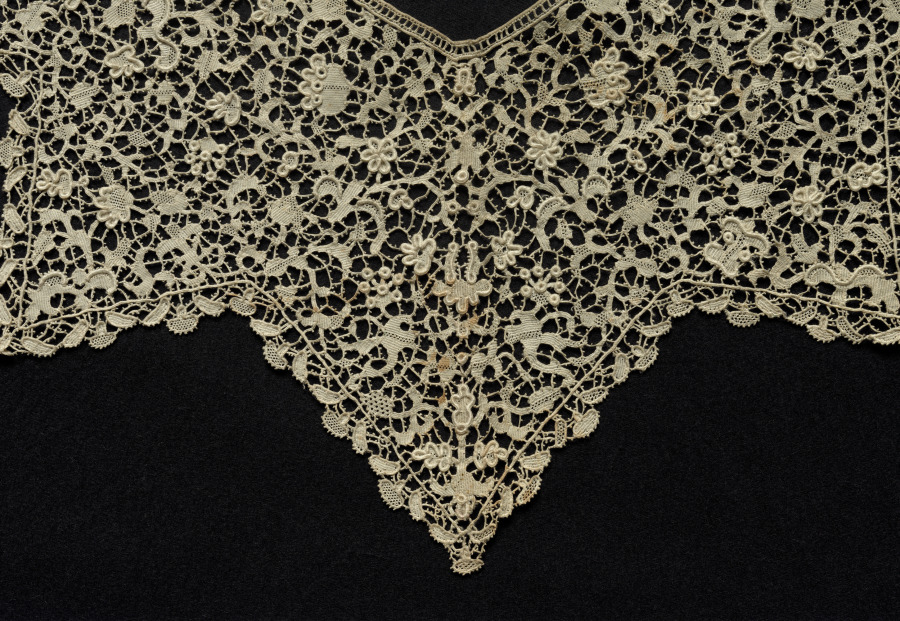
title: Lace Bertha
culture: Italy, Venice, 1800s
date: 1800s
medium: Linen: needle lace (Venetian Rose Point-Punto Rosallino)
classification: Lace